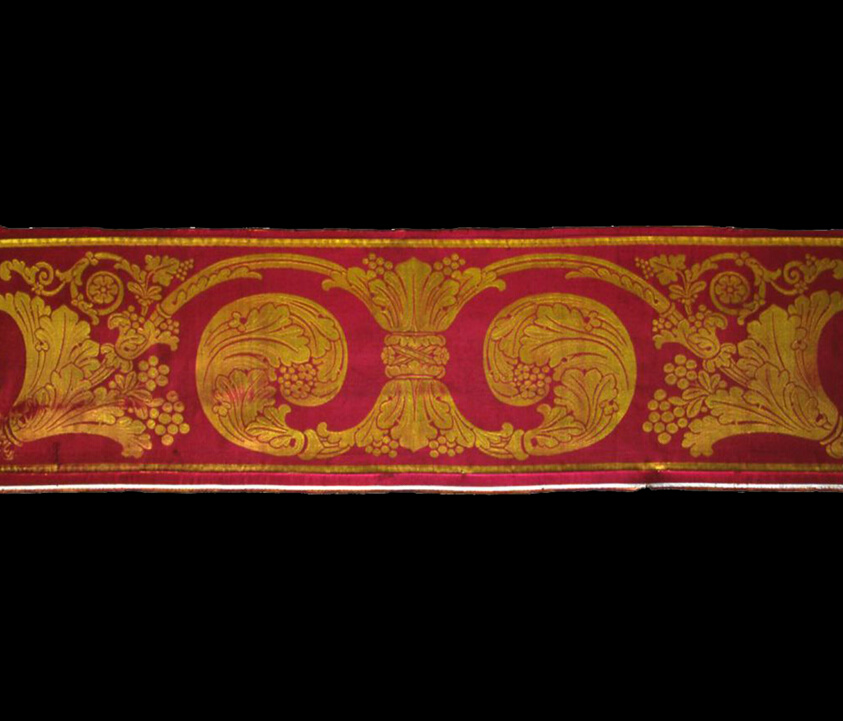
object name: Textile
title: Border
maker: France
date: 1830/40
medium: Silk, warp-float faced 4:1 satin weave with weft-float faced 3:1 plain and twill interlacings of secondary binding warps and supplementary patterning wefts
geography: France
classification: textile; weaving